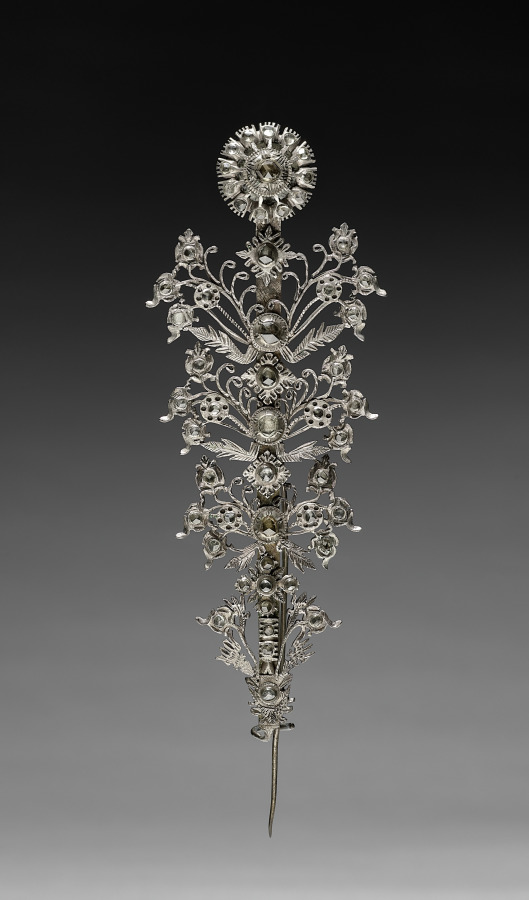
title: Turban ornament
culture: Java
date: 1800s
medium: silver and topaz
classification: Jewelry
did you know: Jakarta was previously known as Batavia and was a capital of the Dutch East Indies.